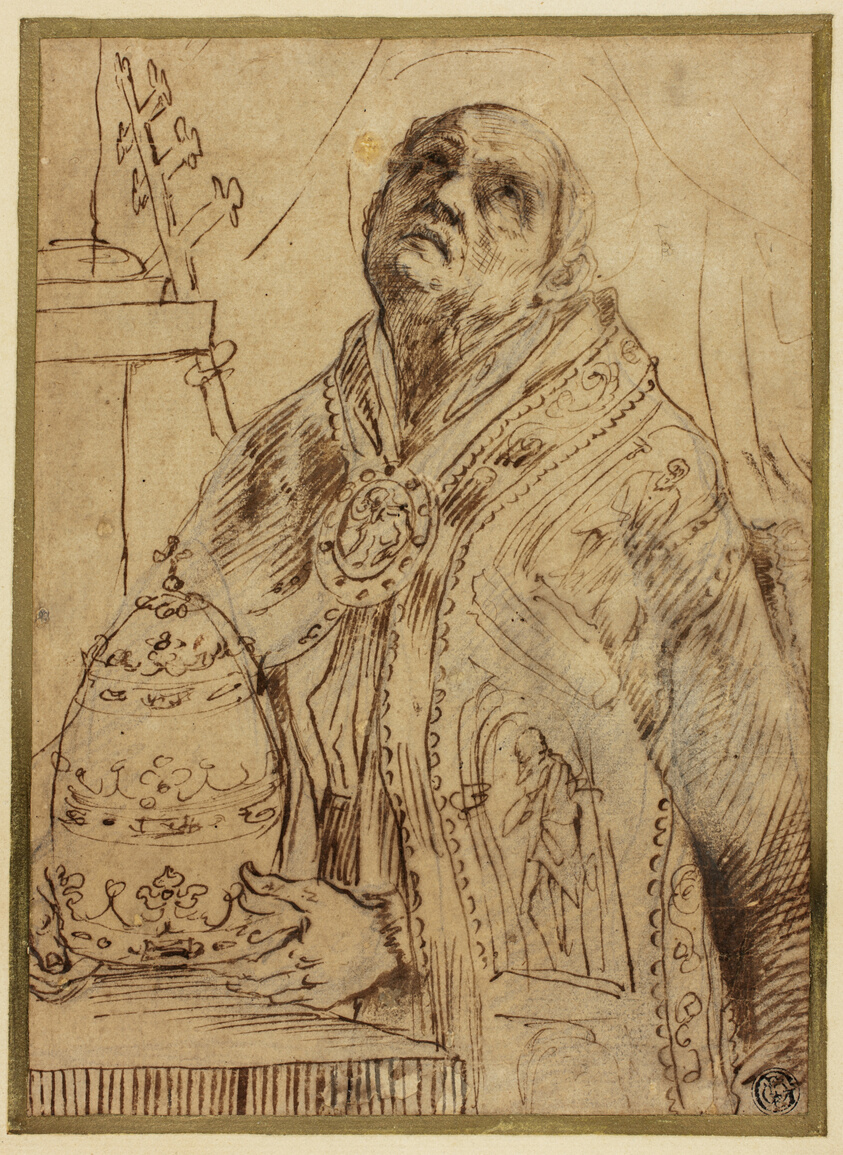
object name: Drawing and Watercolor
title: Papal Saint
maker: Attributed to Giovanni Antonio Burrini; Italian, 1656-1727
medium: Pen and brown ink, with traces of brush and brown wash, with graphite, on tan laid paper, laid down on cream laid card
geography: Italy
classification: pen and ink drawings; drawings (visual works); prints and drawing